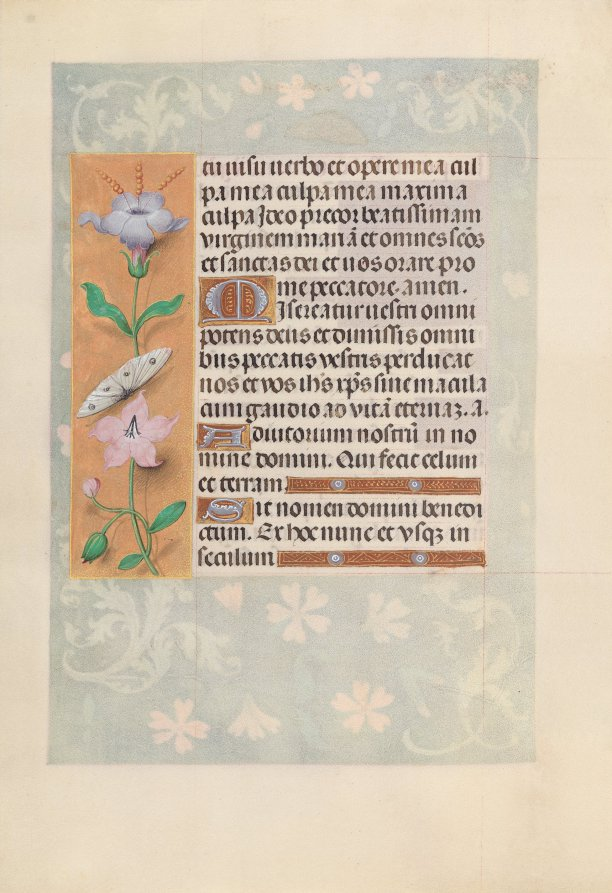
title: Hours of Queen Isabella the Catholic, Queen of Spain: Fol. 88v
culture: Flanders, Ghent and Bruges, late 15th century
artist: Master of the First Prayerbook of Maximillian (Flemish, c. 1444–1519)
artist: and Associates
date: c. 1500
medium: ink, tempera, and gold on vellum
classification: Bound Volume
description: This manuscript was illuminated by a circle of at least five highly organized manuscript painters active in the Flemish cities of Ghent and Bruges. The principal illuminator was Alexander Bening, who painted the majority of the book's miniatures. Manuscripts produced by this circle of artists are renowned for the decoration of their borders, which typically feature a rich variety of realistically-painted flowers, birds, and butterflies. This prayer book, called a book of hours, was intended not for a cleric, but for the private devotions of a lay person-in this case, Isabella the Catholic, Queen of Spain (1451-1504). Isabella's coat of arms embellishes the book's frontispiece. It is unlikely that the book was commissioned by the Queen herself; rather, she probably received it as a diplomatic gift from someone courting her patronage, perhaps Cardinal Francisco Jimenez de Cisneros. A Franciscan friar, Jimenez was dependent upon Isabella for his advancement, first to the post of Queen's confessor in 1492, and then to Archbishop of Toledo in 1495.